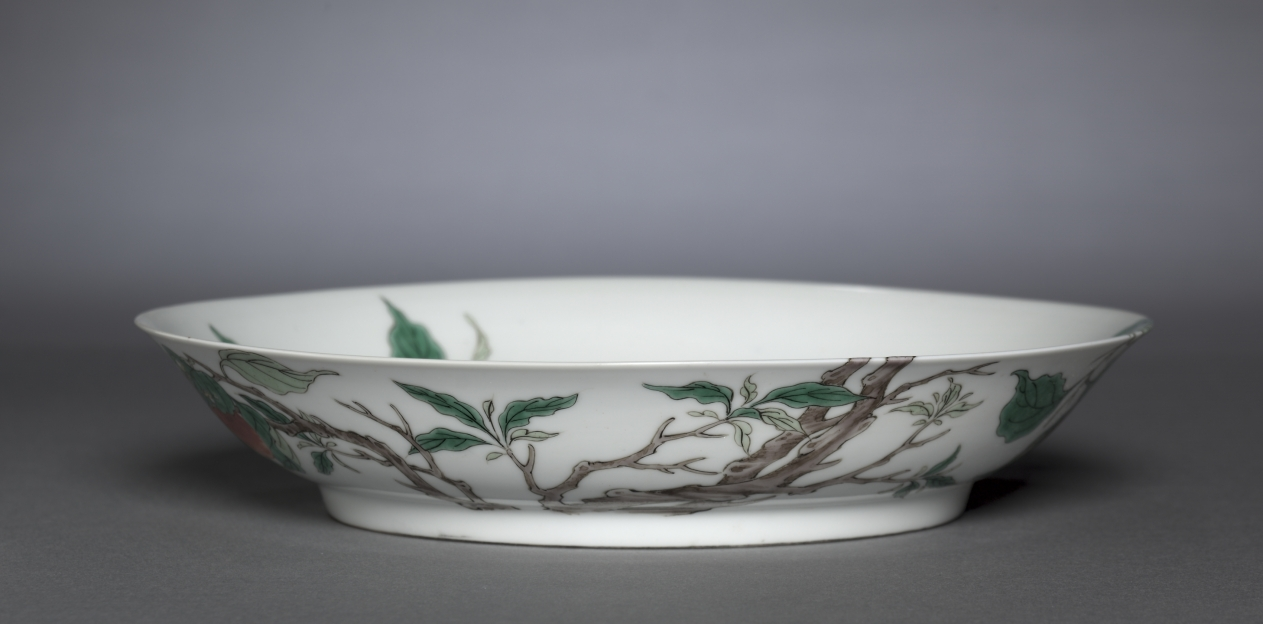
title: Dish with Bird on Fruit Tree Branch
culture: China, Jiangxi province, Jingdezhen kilns, Qing dynasty (1644–1911), Kangxi mark and reign (1662–1722)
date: 1662–1722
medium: Porcelain with famille-verte overglaze enamel decoration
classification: Ceramic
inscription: 大清康熙年制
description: Among the greatest achievements of early Qing porcelain are table wares and display objects decorated with polychrome painting like this pair of dishes. Featuring birds perched in peach trees, the dishes are related to the famous birthday set commissioned for the Kangxi emperor’s sixtieth birthday in 1713. These pieces are more inventive than those in the 1713 set, however, since the unframed ornament is allowed to continue unbroken from the outer to inner surfaces and back out again, thus transforming each vessel into a three-dimensional canvas.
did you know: By the early eighteenth century, the imperial kilns at Jingdezhen were producing exceptionally fine pieces on a staggering scale.